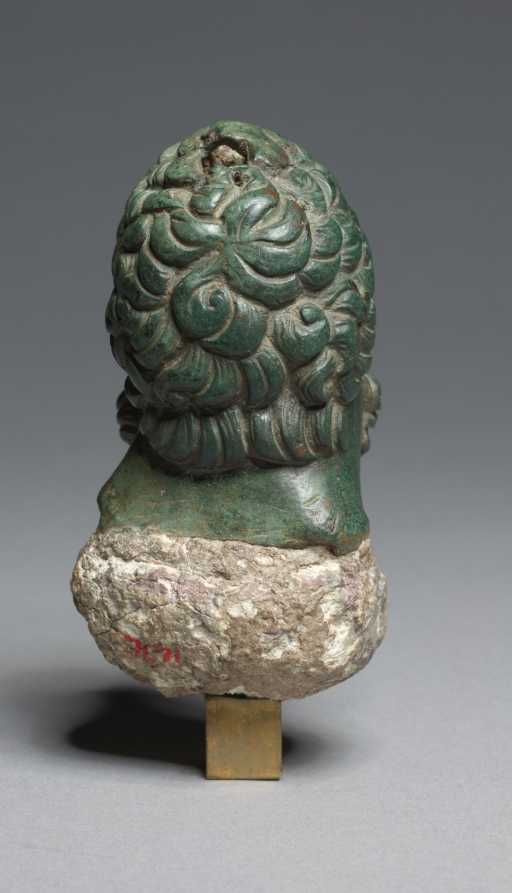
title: Head of Herakles Refashioned as a Weight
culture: Greece, Hellenistic period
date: 300–200 BCE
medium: bronze filled with lead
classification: Sculpture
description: Even without his club or lion skin, the short curly hair and full curly beard identify this miniature head as that of Herakles. The eyes and mouth were likely once inlaid. His upward gaze suggests the head may be based on the Herakles Epitrapezios by Lysippos, the personal sculptor of Alexander the Great. The original Herakles Epitrapezios survives only through copies, including this one as well as a slightly later marble version also in Cleveland (among many others). This head was refashioned into a weight, probably in the Roman period, by filling it with lead and adding holes for a hook.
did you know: Romans filled their weights with lead because it was plentiful, cheap, and easy to shape.